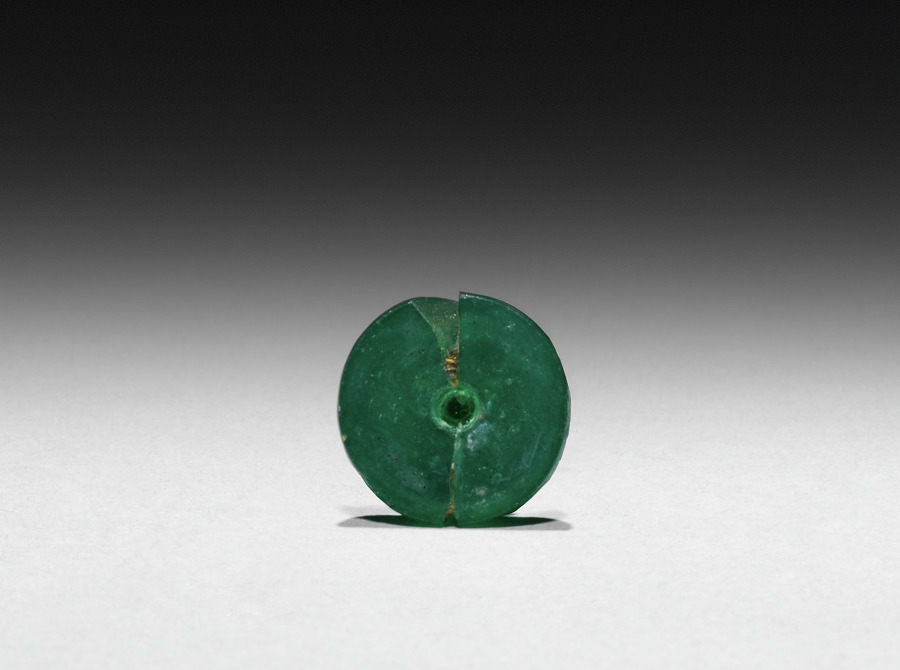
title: Snuff Bottle (stopper)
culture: China, Qing dynasty (1644-1911)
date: 1644–1911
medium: glass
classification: Glass